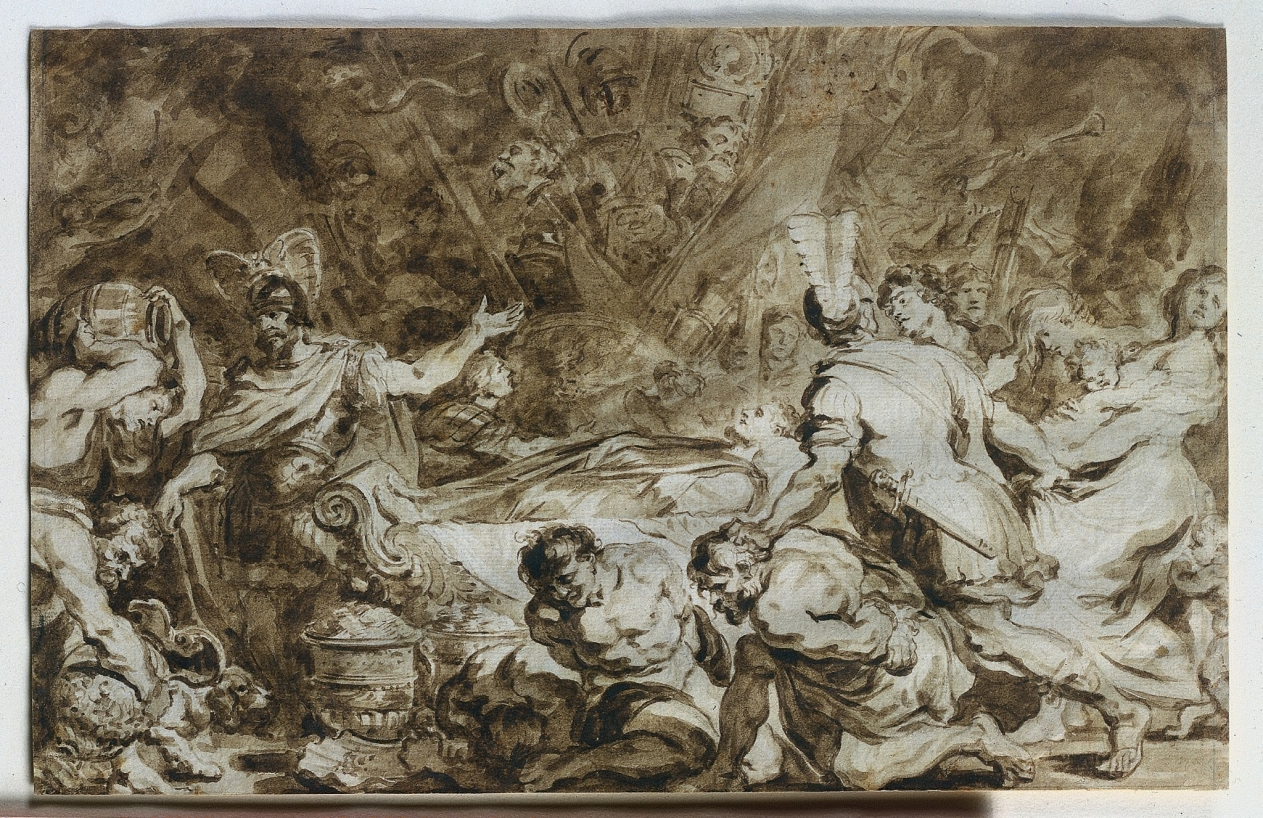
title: The Funeral of Decius Mus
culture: France, 18th century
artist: Jean-Honoré Fragonard (French, 1732–1806)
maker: after Peter Paul Rubens (Flemish, 1577–1640)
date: 1774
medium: brush and brown ink and wash over black chalk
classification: Drawing